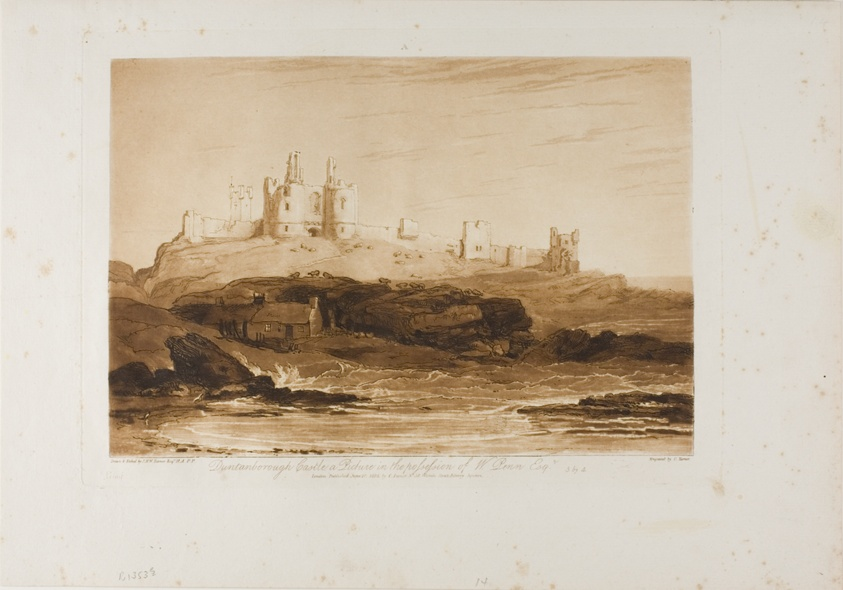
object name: Print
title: Dunstanborough Castle, plate 14 from Liber Studiorum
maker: Joseph Mallord William Turner (English, 1775-1851); Engraved by Charles Turner (English, 1773-1857)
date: published June 10, 1808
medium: Etching and engraving in brown on ivory laid paper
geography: England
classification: etching; print; prints and drawing